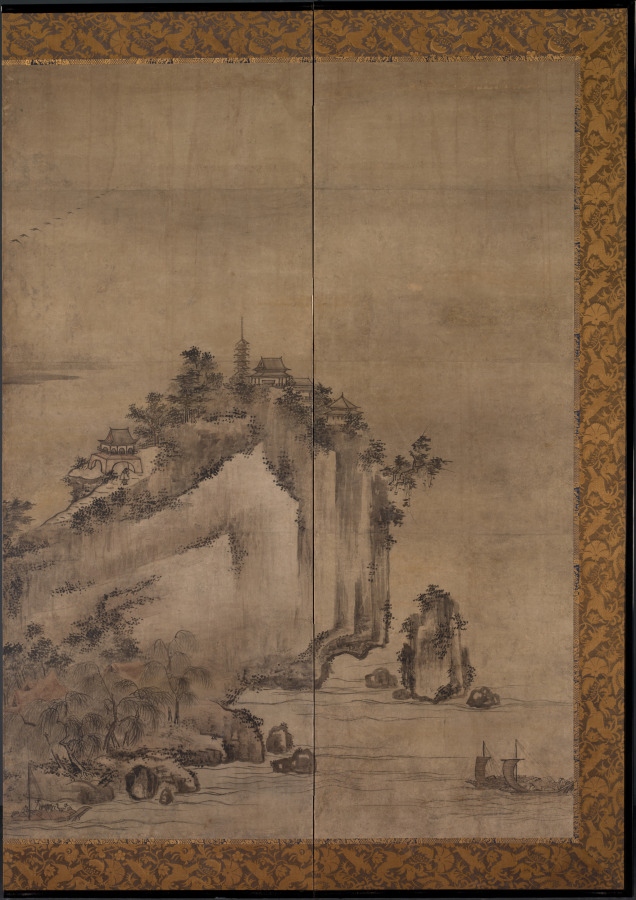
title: Landscape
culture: Japan, Muromachi period (1392–1573)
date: 1550–99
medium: One of a pair of six-panel folding screens; ink and color on paper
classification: Painting